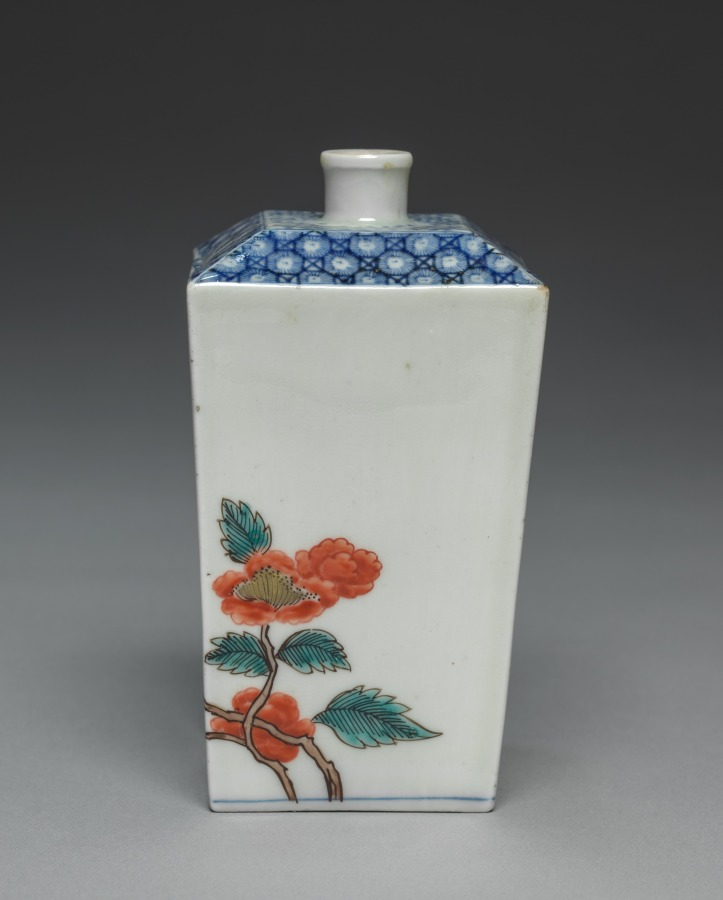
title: Bottle with Bird and Butterfly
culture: Japan, Edo period (1615–1868)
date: late 1600s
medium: porcelain with underglaze blue and overglaze color enamel and gold (Hizen ware, Ko-Imari type)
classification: Ceramic